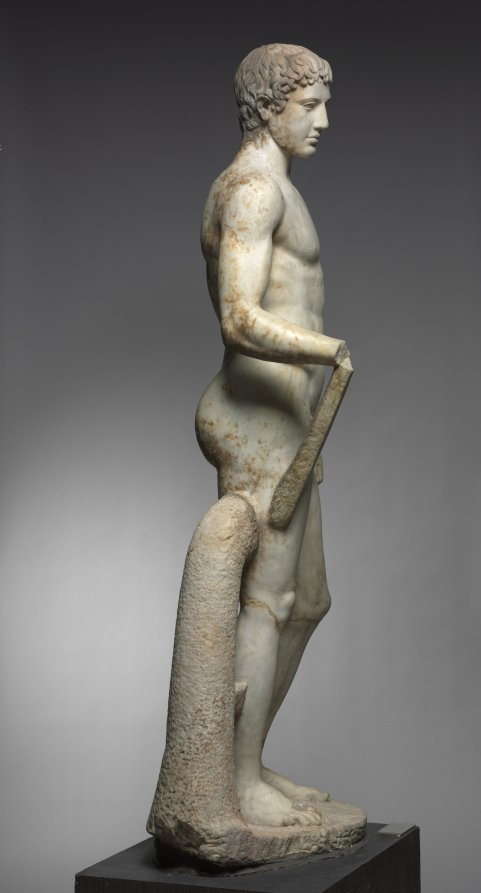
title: Statue of an Athlete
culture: Italy, Roman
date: 1–100 CE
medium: marble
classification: Sculpture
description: This idealized athlete recalls Greek sculptural types invented and popularized during the 400s BC. Large-scale athletes and other sculptures like this were originally created by famous artists as sanctuary dedications. Centuries later, they were widely copied and adapted by Roman sculptors, whose clients sought their own versions of earlier masterpieces. Working in marble rather than bronze, these sculptors added certain elements for stability, such as the struts and the large tree trunk beside the right leg here. Sculptures like this one are profoundly complex, made by and for Romans but descended from Greek ancestors.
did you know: For many years, this sculpture stood in the rotunda of the Cleveland Museum of Art.